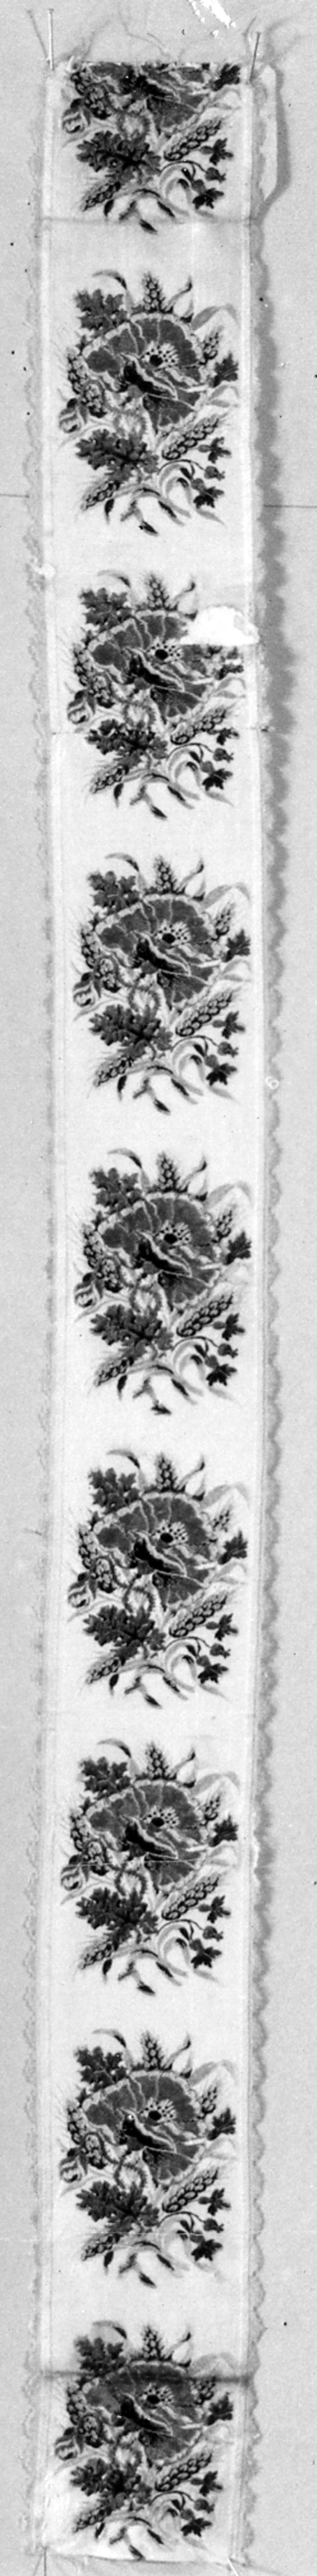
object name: Book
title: Sample Book of Ribbons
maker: France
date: c. 1850/60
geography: France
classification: textile; weaving; book